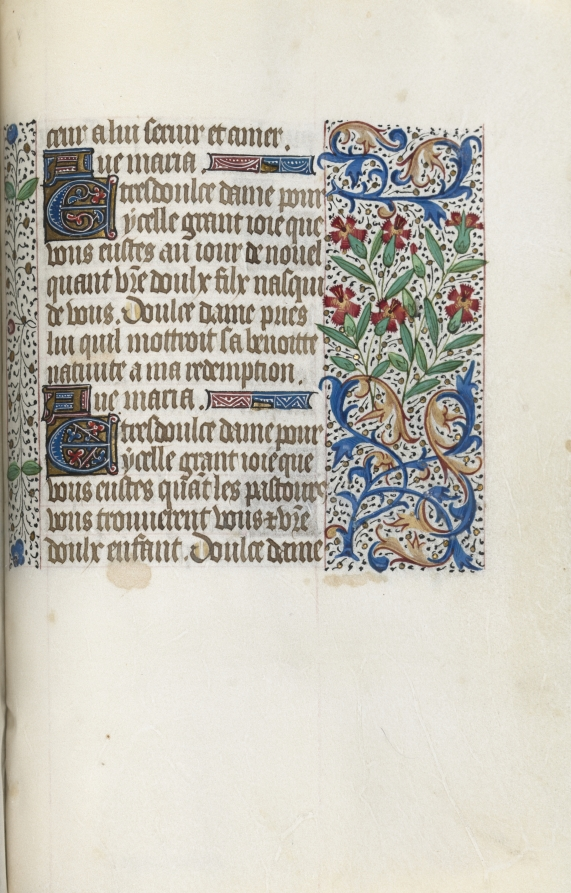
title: Book of Hours (Use of Rouen): fol. 148r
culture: France, Rouen, 15th century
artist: Master of the Geneva Latini (French, active Rouen, 1460–80)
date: c. 1470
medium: ink, tempera, and gold on vellum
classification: Bound Volume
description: In the late 1400s and early 1500s Rouen was an established and important center of book production. The city’s cathedral had a wealthy chapter that spent large sums of money to commission books and to maintain its extensive library. The stationers and booksellers would have likely been concentrated in or near the cathedral precinct. This artist, named after a manuscript now in Geneva, was Rouen’s principal illuminator during the second half of the 1400s.